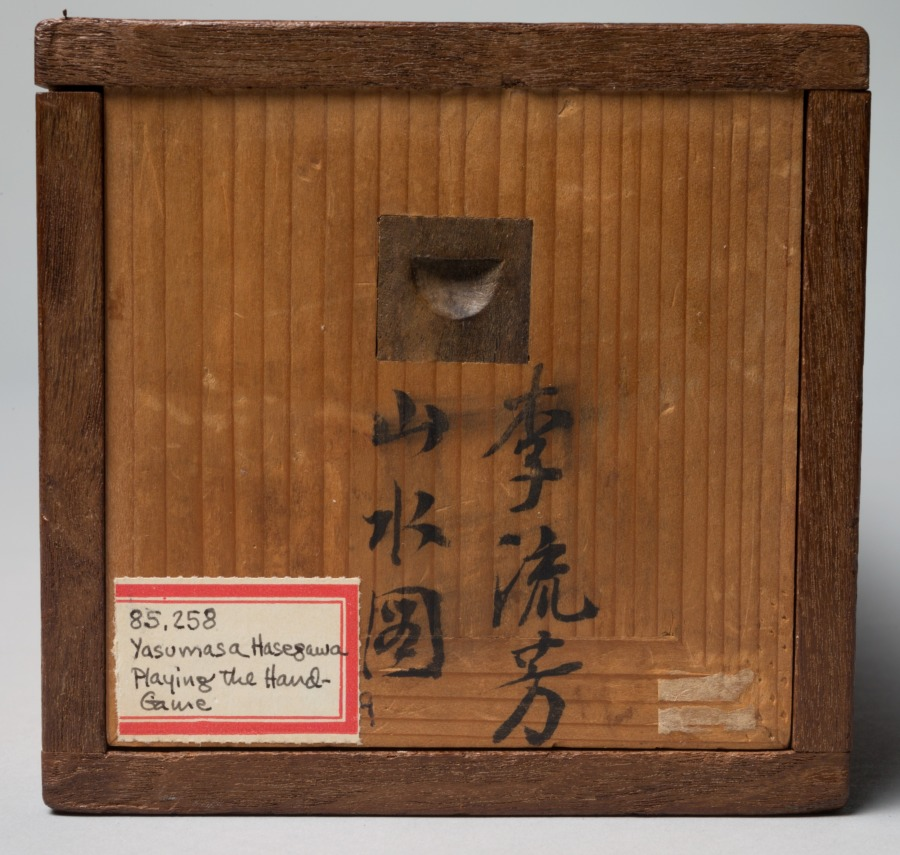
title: Playing the "Hand Game"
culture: Japan, Edo period (1615–1868)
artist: Hasegawa Yasumasa (Japanese)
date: c. 1760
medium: hanging scroll; ink and color on paper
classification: Painting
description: This scene depicts three people playing a game in which three players make hand gestures simultaneously. The relationship among the gestures determines the winner. Known as hand games, during the eighteenth century they were popular in Japan among courtesans. In this version, the contestants use both hands, indicating a special variation such as the fox hand game, which features gestures for a fox, a village leader, and a hunter.